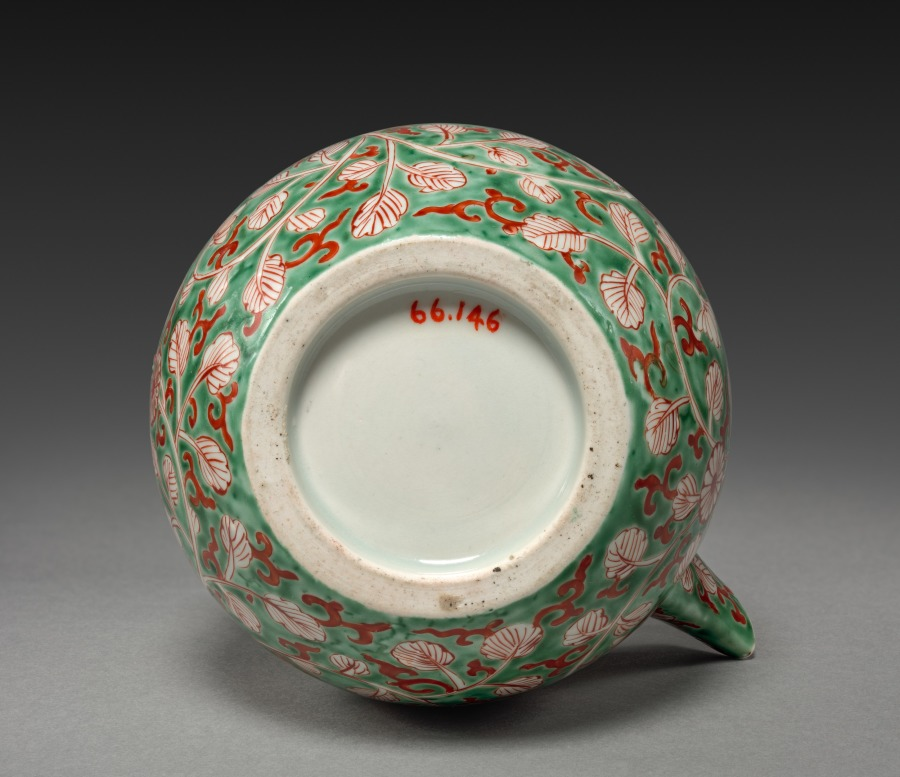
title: Wine Pot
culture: Japan, Edo period (1615–1868)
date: 1615–1868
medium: porcelain with colored enamel decoration (Hizen ware, Arita type)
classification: Ceramic